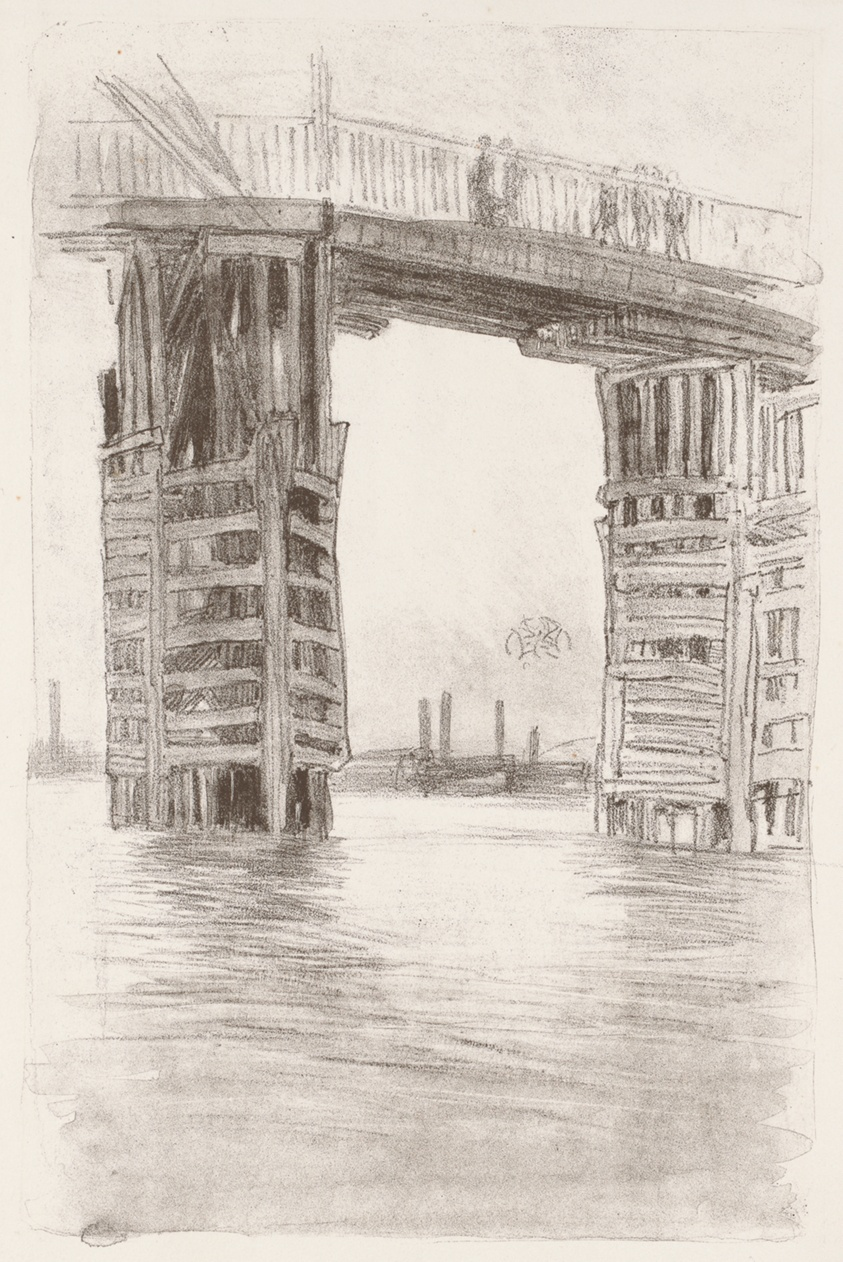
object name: Print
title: The Tall Bridge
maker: James McNeill Whistler (American, 1834-1903)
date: 1878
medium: Lithotint, in black ink, with scraping, on ivory plate paper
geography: United States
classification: lithotint; lithograph; print; prints and drawing; paper